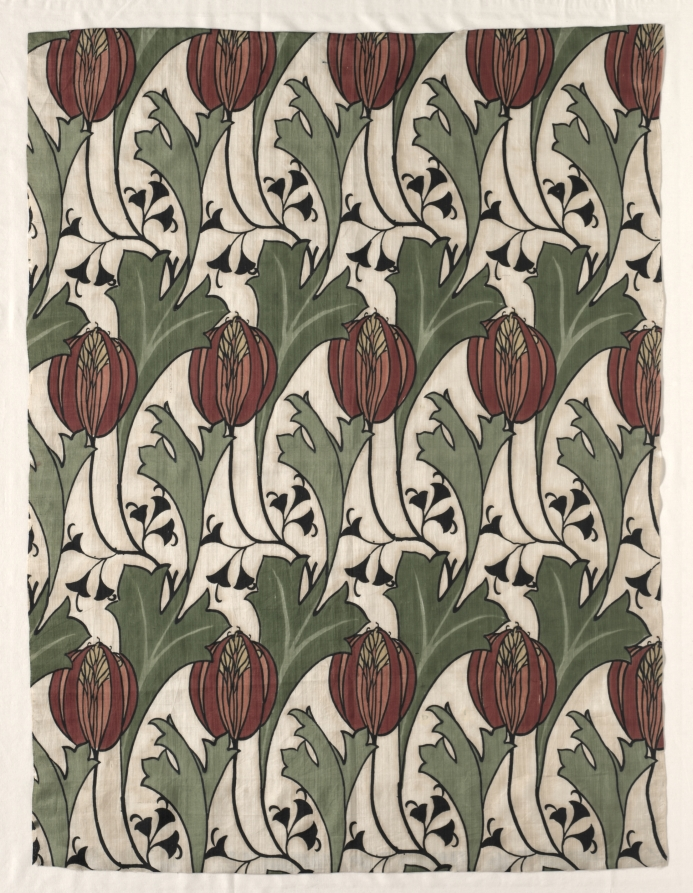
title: Fragment with "Petworth" Design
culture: England, 19th century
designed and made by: Liberty and Company (British)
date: 1890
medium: roller printed silk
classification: Textile